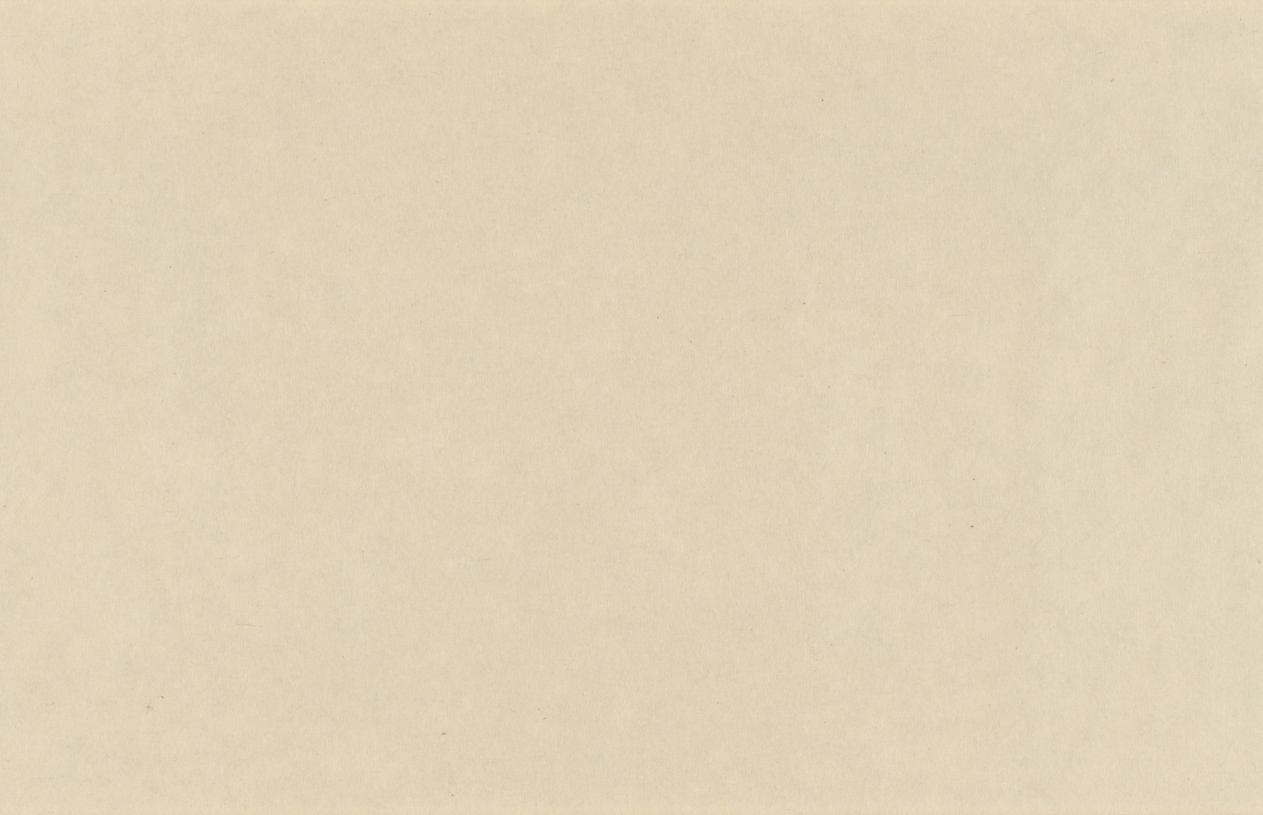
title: Eight Views of Xiao-Xiang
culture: Japan, Muromachi period (1392–1573)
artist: Sesson Shūkei (Japanese, c. 1492–c. 1577)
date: 1500s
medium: handscroll; ink on paper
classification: Painting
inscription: Signature and seal of artist at end of painting.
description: Eight Views of the Xiao and Xiang Rivers can be traced to 11th-century Chinese poems and paintings, the depiction of which had also become popular among Korean and Japanese painters. Xiao-Xiang refers to the region in present-day Hunan province where the Xiao and Xiang rivers converge. Few painters of the Eight Views had in fact seen the scenery; rather, they were trying to portray in ink and wash the lyrical qualities of dim light and a misty atmosphere typical of that region. Each of the poetic titles suggests a time of day, a season, or specific atmospheric conditions—subjects that challenged the abilities of the most talented artists. In this miniature painting (shukuzu) of the Muromachi period, Japanese Zen monk and painter Shukei Sesson depicted all eight views featured in Chinese prototypes: Wild Geese Descending to Sandbar; Returning Sails Off a Distant Coast; Mountain Market in Clearing Mist; River and Sky in Evening Snow; Autumn Moon over Dongting Lake; Night Rain on the Xiao and Xiang; Evening Bell from Mist-Shrouded Temple; and Fishing Village in Evening Glow.